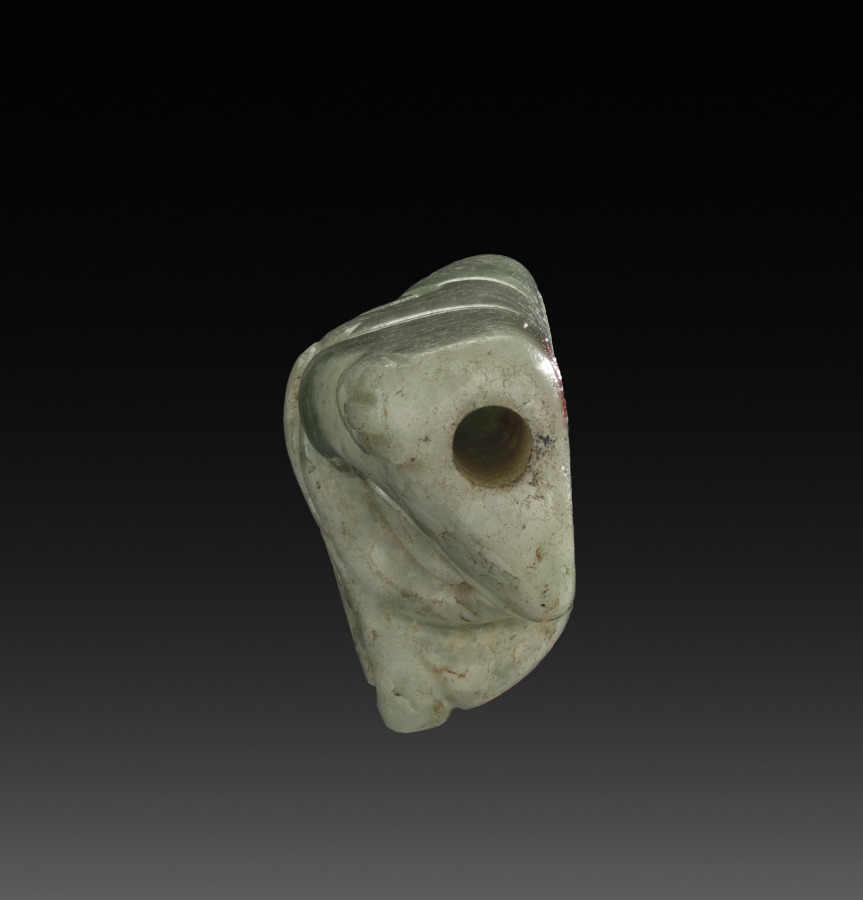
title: Pendant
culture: Maya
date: 250–900 CE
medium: jadeite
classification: Jade